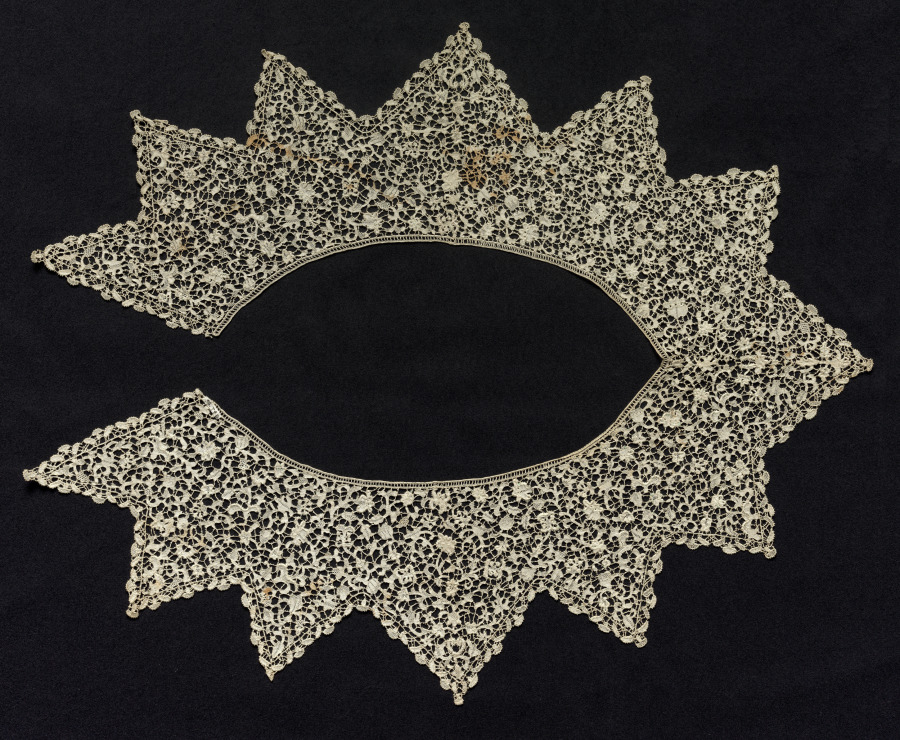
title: Lace Bertha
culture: Italy, Venice, 1800s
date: 1800s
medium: Linen: needle lace (Venetian Rose Point-Punto Rosallino)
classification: Lace